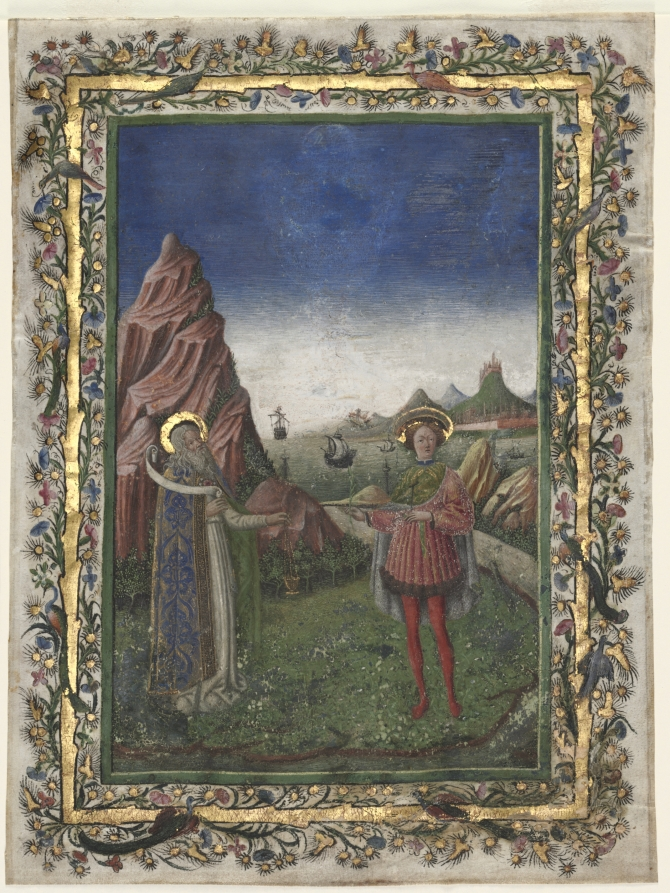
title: Single Leaf from a Missal: Two Male Saints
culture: Italy, Venice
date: late 1400s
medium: tempera on parchment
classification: Manuscript